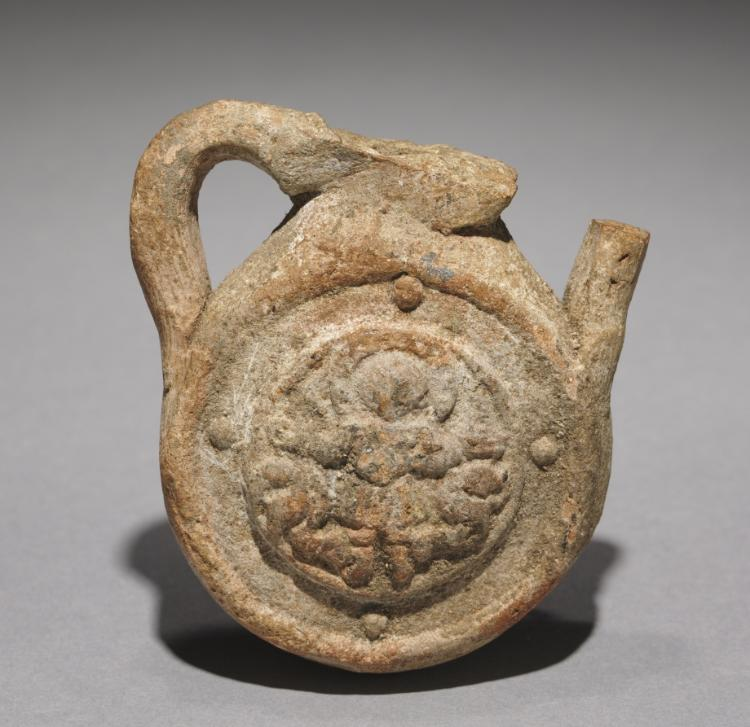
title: Pilgrim's Flask with Saint Menas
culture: Egypt, Coptic period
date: 400–600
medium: terracotta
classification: Ceramic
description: These flasks bear the image of Saint Menas, an early martyr of the Christian Church whose shrine was in the desert southwest of Alexandria in Egypt. These flasks were probably used by pilgrims to hold oil taken from the lamp that burned over this saint's tomb. Probably manufactured near the shrine, pilgrim's flasks often bear decorations hinting at their place of origin, as is the case here.